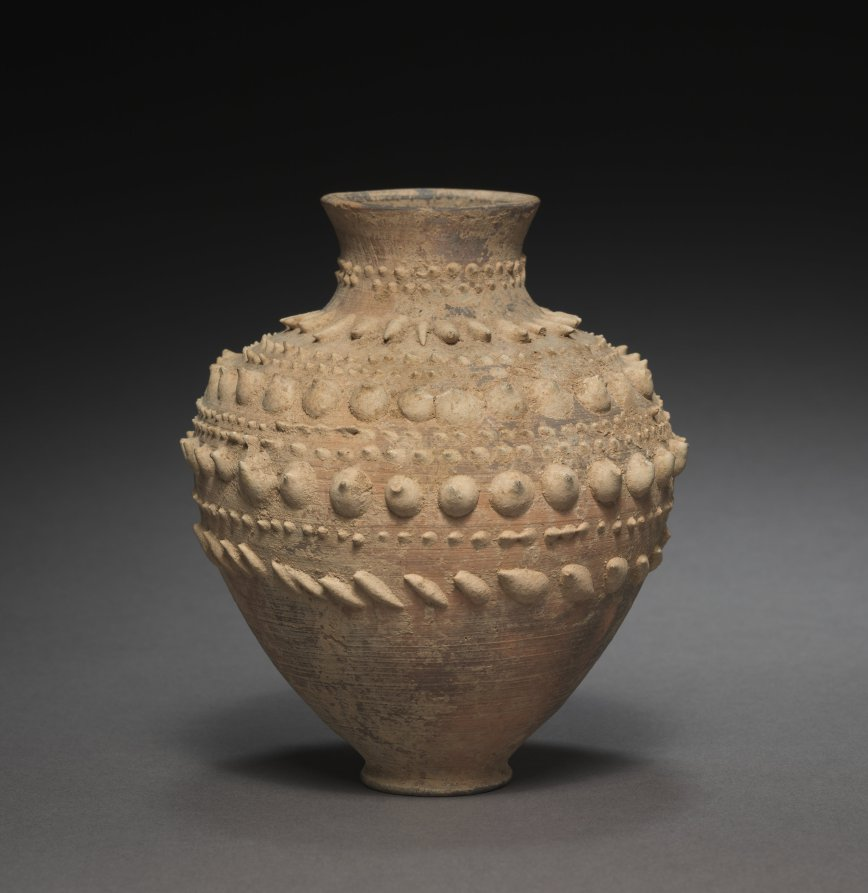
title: Barbotine Vase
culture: Egypt, Greco-Roman period (332 BCE–395 CE), Roman empire (30 BCE–395 CE)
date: 1–300 CE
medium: Marl clay ware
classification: Vessels